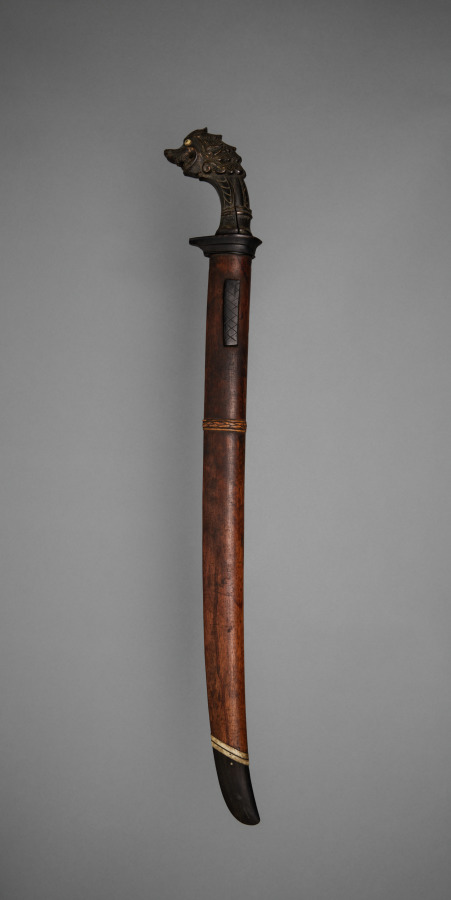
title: Sword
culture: Indonesia, Sulawesi (Celebes)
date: before 1918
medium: metal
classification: Arms and Armor